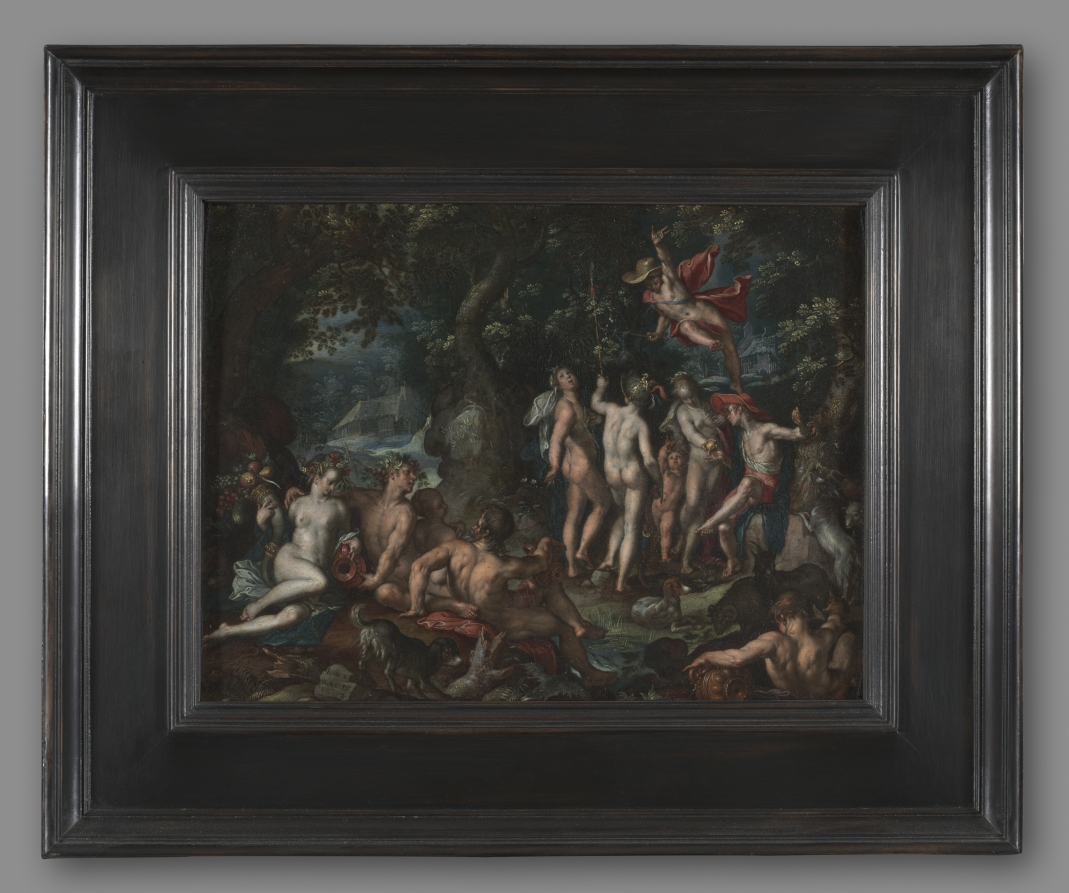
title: The Judgment of Paris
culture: Netherlands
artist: Joachim Anthoniz Wtewael (Dutch, 1566–1638)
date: 1602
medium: oil on copper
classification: Painting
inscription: signed lower left: IO. WTE / WAEL. FE / 1602 [TE, AE in monogram]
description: The Trojan prince Paris was asked to determine which goddess was the most beautiful. Hera (tothe left of the group) offered him political power, and Athena (seen from the back), military prowess, but Paris awarded the golden apple to Venus, the goddess of love, who promised him Helen, the most beautiful mortal in the world.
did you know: The artist dated and signed this work on a rock at the bottom right of the painting.